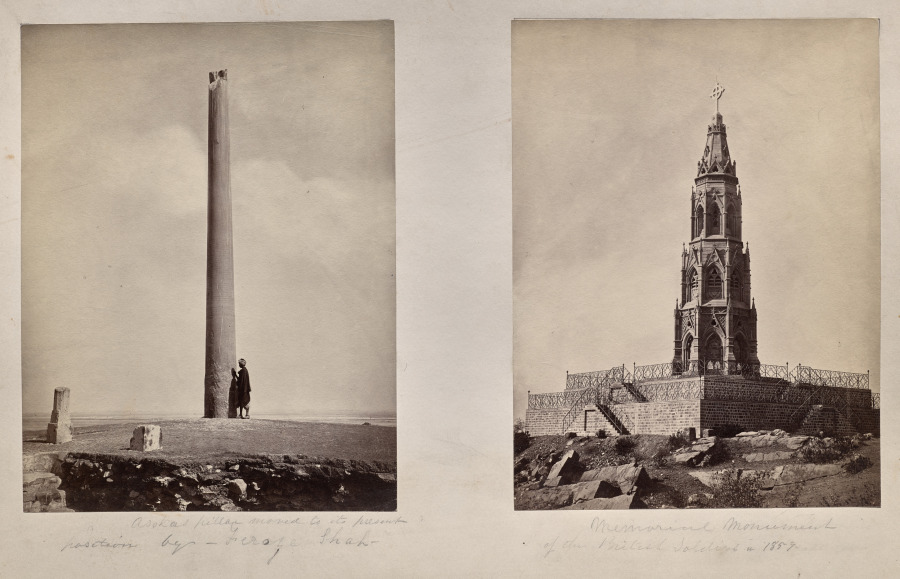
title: Left: [Ashoka Pillar moved to its present position by Feroz Shah]. Right: Memorial Monument of the British Soldiers in 1859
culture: England, 19th century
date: 1870s-1880s (?)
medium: 2 albumen prints mounted on an album page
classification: Photograph